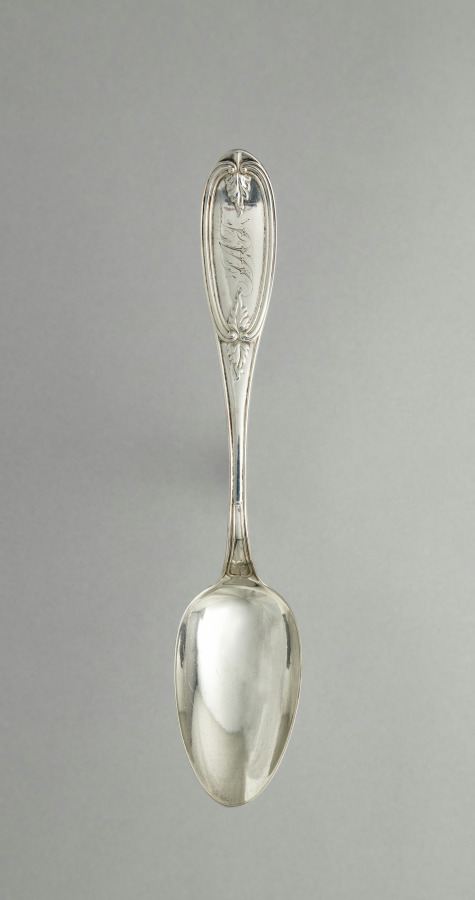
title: Tablespoon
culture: America, Connecticut, Hartford, 19th century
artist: firm of T. Sedgwick Steele (American)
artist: firm of Thomas Steele (American, 1812–1875)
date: c. 1859–1865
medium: silver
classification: Silver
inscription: engraved "JAT" in bright-cut script on top of handle end.